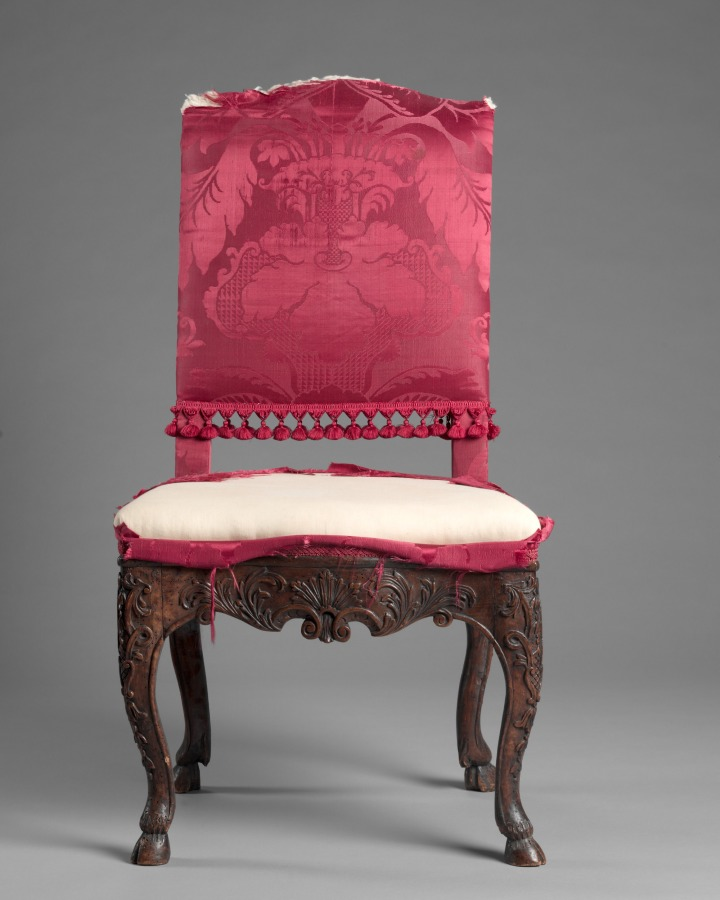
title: Pair of Side Chairs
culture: Germany, Belgium, or the Netherlands, early 18th century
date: early 1700s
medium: walnut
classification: Furniture and woodwork